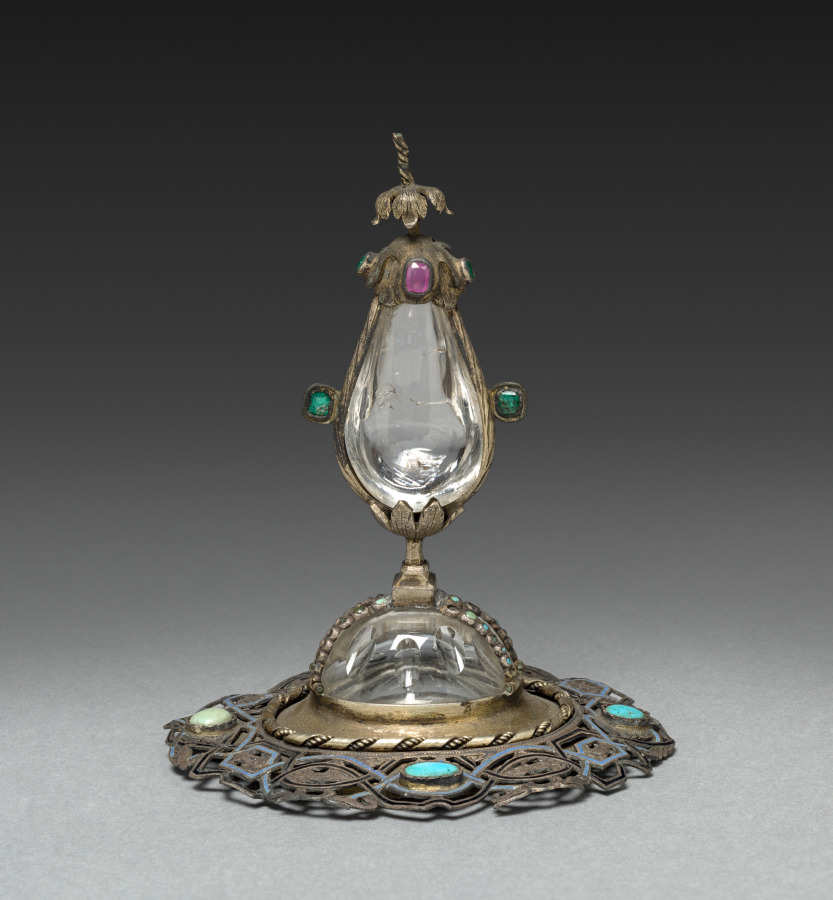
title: Blood Reliquary (lid)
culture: Italy (?), 16th century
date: 1500s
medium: gilt silver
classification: Metalwork